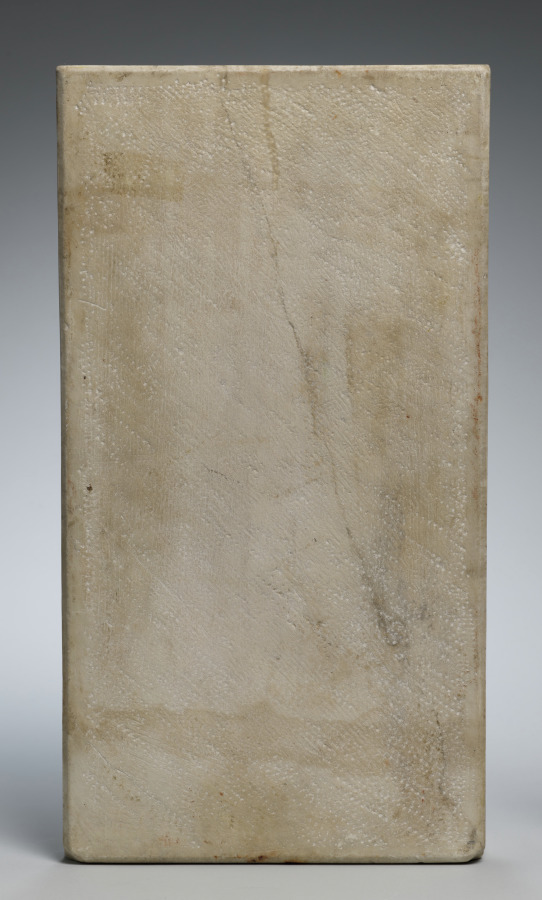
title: Dido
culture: Italy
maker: Aurelio Lombardo (Italian, 1501–1563)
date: c. 1525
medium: marble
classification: Sculpture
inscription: PVNICA SVM [DIDO ERE]XI QVAE MOENIA BYRSA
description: Artists customarily portrayed Dido as a forlorn lover abandoned by the Trojan hero, Aeneas, but here she is a conquering queen. Dido draws aside an oxhide curtain, a reference to the mythical founding of Carthage (in modern-day Tunisia, North Africa), when she was given an oxhide to demarcate granted land. By cutting it into thin strips she was able to encircle the future city. Dido was likely created for display in a studiolo, a place of study featuring refined works of art appreciated by humanist scholars and aficionados during the Renaissance.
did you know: Dido’s nudity and hairstyle are allusions to ancient Greek images of Aphrodite.